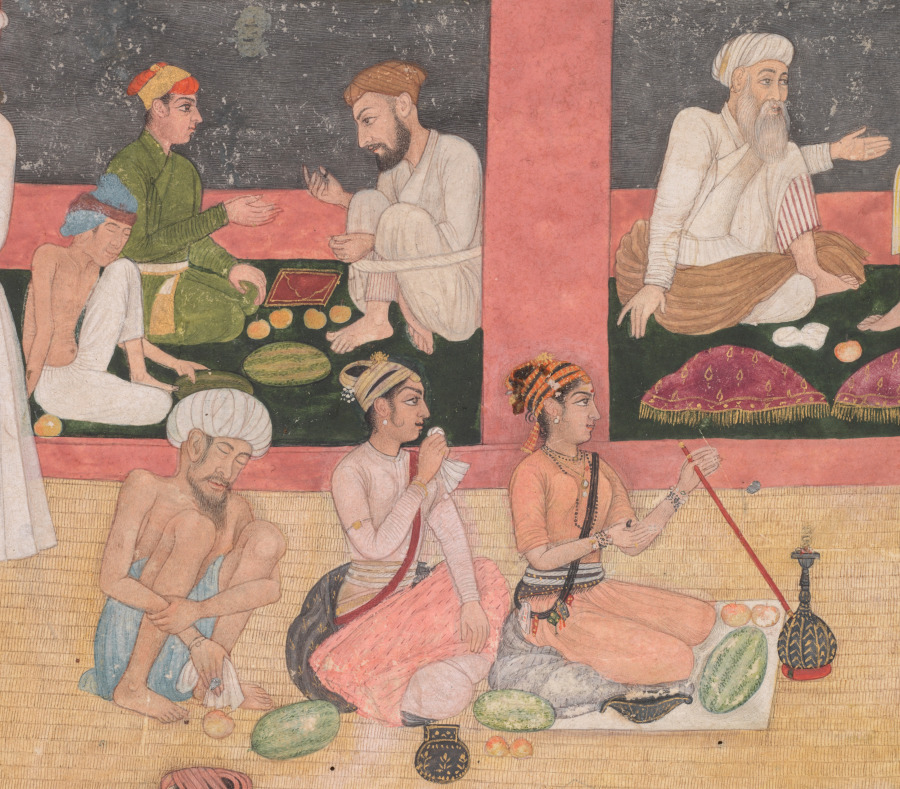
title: Opium Smokers Served Fruit and Bread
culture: India, Mughal Dynasty (1526-1756)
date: c. 1750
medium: Gum tempera and gold on paper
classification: Painting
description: A red sandstone terrace and veranda covered with a straw mat is the setting for an assemblage of more than 30 religious figures and nobles, most of whom are depicted in varying stages of intoxication and hangovers. To the left of center is a female ascetic wearing a peach-colored robe, and throughout the composition Sufi mystics wearing blue are interspersed with white-robed clerics and Mughal nobles. Some lucidly engage in discussions, while others prepare, ingest, and experience the effects of cannabis or opium known to have been taken regularly by those seeking mind-altering states. Watermelons, apples, and flatbread are being distributed among the assembled guests.